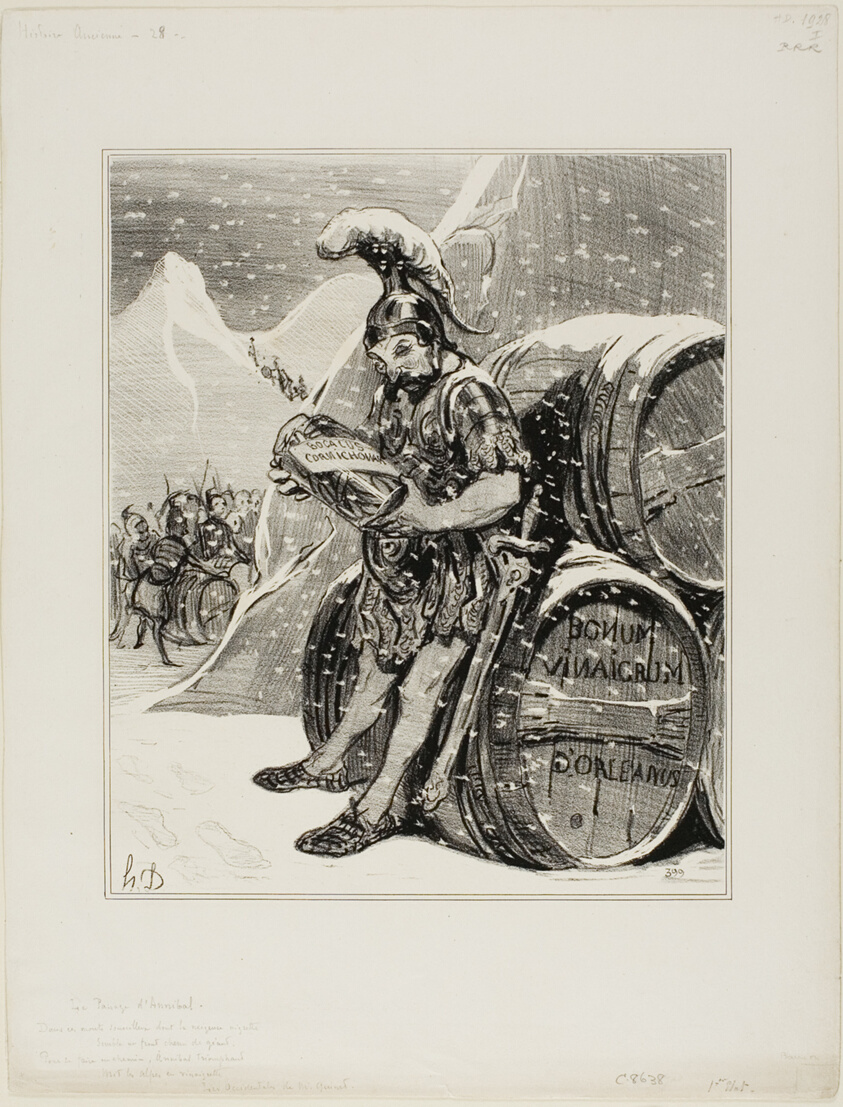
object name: Print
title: Hannibal's Crossing. These lofty mountains where the crested snow resembles the white forehead of a giant trembles to forge a road, with a triumphant song Hannibal turned the Alps into cornichon. (Les Occidentals by Mr. Quinet), plate 28 from Histoire Ancienne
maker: Honoré Victorin Daumier; French, 1808-1879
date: 1842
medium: Lithograph in black on white wove paper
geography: France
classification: lithograph; print; prints and drawing